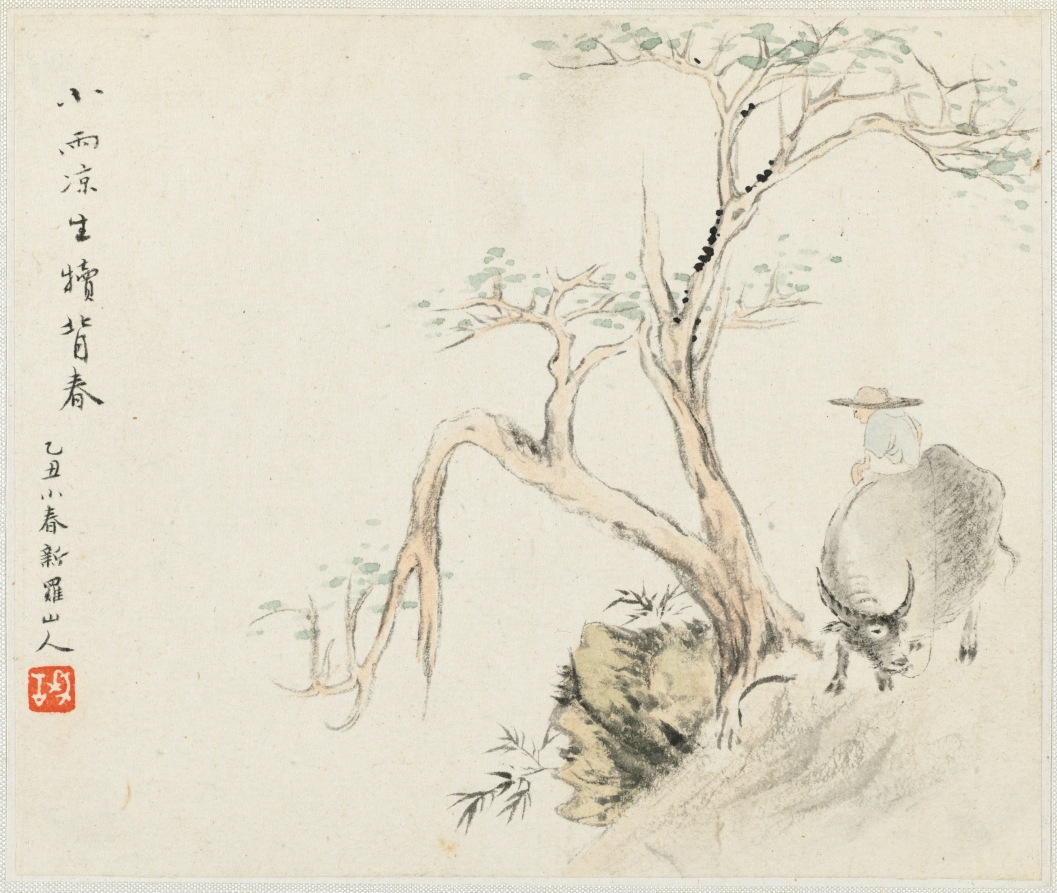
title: Album of Landscape Paintings Illustrating Old Poems: Boy Tending a Water Buffalo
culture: China, Qing dynasty (1644-1911)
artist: Hua Yan (Chinese, 1682–c. 1765)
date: 1745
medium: Album leaf; ink and light color on paper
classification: Painting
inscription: 小雨涼生犢背春 / 乙丑小春新羅山人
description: Hua Yan is one of the Eight Eccentrics of Yangzhou, who rejected Orthodox ideas about painting.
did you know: Tending water buffalos has traditionally been the task of young boys and can still be seen in rural areas of Southern China today.